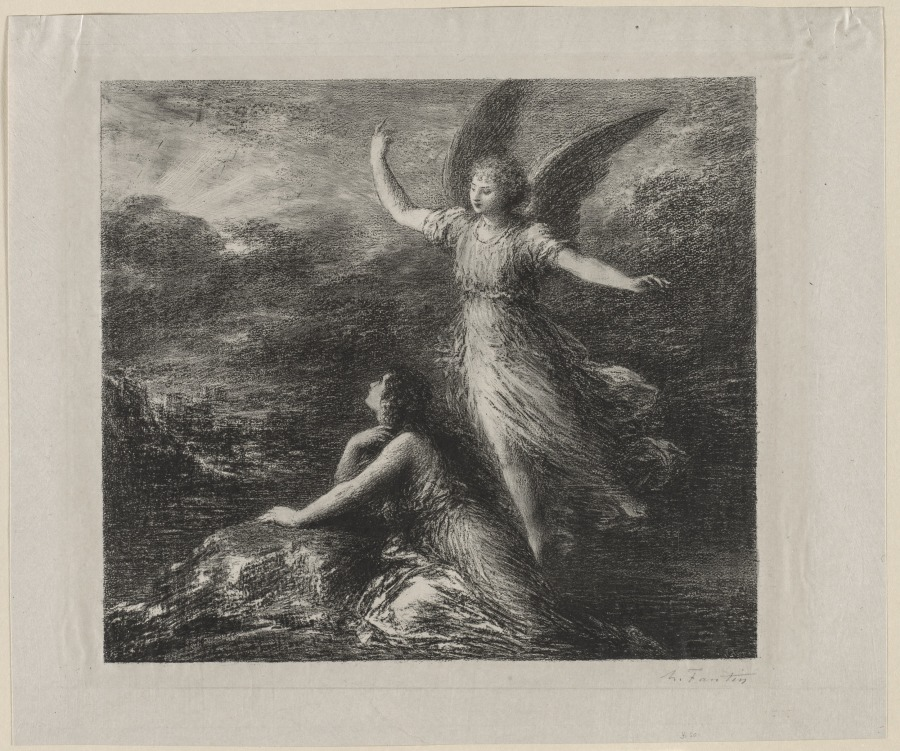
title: Le Paradis et la Peri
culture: France, 19th century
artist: Henri Fantin-Latour (French, 1836–1904)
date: 1884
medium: lithograph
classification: Print